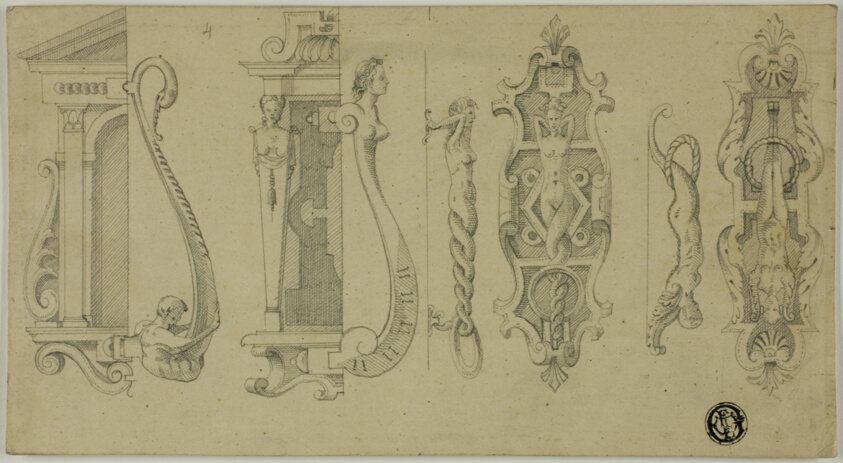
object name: Drawing and Watercolor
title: Ironwork Door Knockers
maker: After Jacques Androuet du Cerceau, II; French, 1550-1614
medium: Graphite, on cream tracing paper, laid down on ivory wove paper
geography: France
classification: graphite; drawings (visual works); prints and drawing